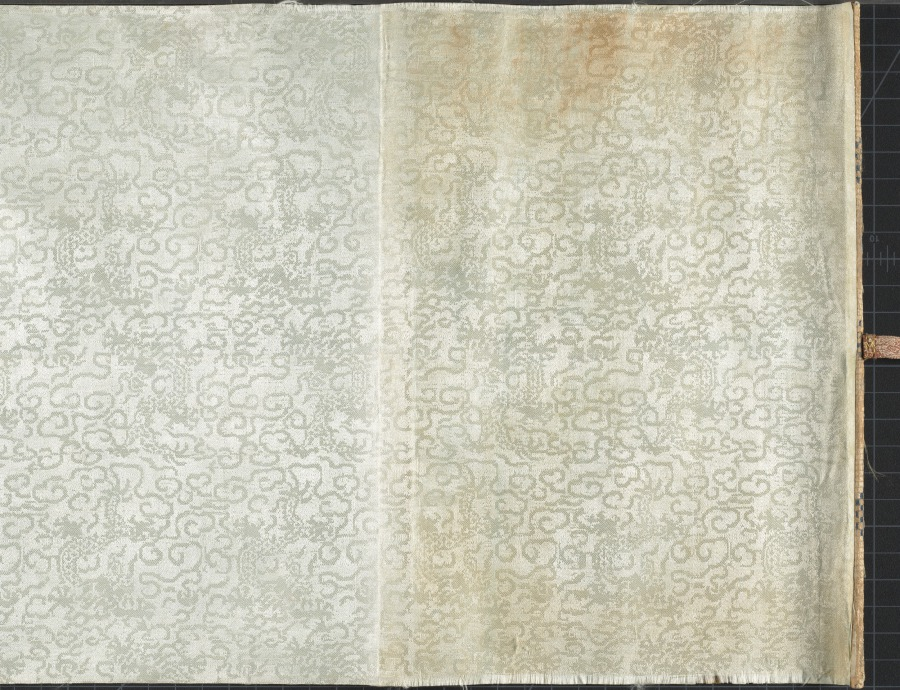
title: Garden for Solitary Enjoyment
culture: China, Ming dynasty (1368–1644)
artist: Qiu Ying (Chinese, 1494–1552)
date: 1515–52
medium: Handscroll; ink and light color on silk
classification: Painting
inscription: Accompanying text of an essay together with seven poems of Sima Guang (1019–1086) and one poem of Su Shi (1037–1101) written by Wen Zhengming (1470–1559) in 1558.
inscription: 2 colophons and 82 seals: 4 seals of Wen Zhengming 文徵明 (1470–1559); 59 seals of Xiang Yuanbian 項元汴 (1525–1590); 1 colophon, dated 1644, and 7 seals of Xiang Yukui 項禹揆 (c. late 1500s–1659); 1 colophon, dated 1880, and 2 seals of Weng Tonghe 翁同龢 (1830–1904); 2 seals of Ch'eng Chen-i (19th c.); 1 seal of Han Ch'ung (19th c.); 4 seals of Wan-go H. C. Weng 翁萬戈 (1918–2020); 3 seals unidentified.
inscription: Colophon by Xiang Yukui 項禹揆 (c. late 1500s–1659): The painting of The Garden for Self-enjoyment on the right by Shih-chou, Mr. Qiu [Qiu Ying] is in the style of Li Lung-mien. Its mood is peaceful, as if meeting the ancient gentlemen face to face among the brushes and silk; it lifts one above the sordid bustle of life. Formerly, my late father handed me this scroll which had only the painting without the written essay. I considered asking a good calligrapher to write the essay to add to it but was afraid that the quality of the writing would not match the painting. Several years later, I saw at a friend's house this essay and poems (of Ssu-ma Kuang] written by Hengshan [Wen Zhengming], once owned by my grandfather; so I spared no expense to obtain it. I rejoiced at this and said: "The divine swords are finally united. How things are pre-destined!" Now my friend Chang Kung-chao's technique for mounting [painting and calligraphy] is excellent. Therefore by daring to take them out and join them together, I can preserve this beautiful story of singular reunion. Xiang Yukui recorded at Hai-yeh-t'ang [hall] two days before New Year's Eve in the jiasheng year of the Chongzhen era [1644]. trans. LYSL/HK/WKH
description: Garden of Solitary Enjoyment refers to a site built in 1073 by the statesman Sima Guang (1019–1086) after he had retired to Luoyang, Henan province. Every spring, visitors would flock to his garden. Each of its seven structures references a historic figure. Sima wrote: I channel streams [like Du Mu], to water flowers [like Bai Juyi], or trim bamboo [like Wang Huizhi]. . . . I know of no joy between heaven and earth that could take its place. Qiu Ying’s painting, created after an 11th-century version of the same theme, must have appealed to garden owners of the Ming dynasty, since it became the template for numerous Suzhou workshop copies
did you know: Sima Guang completed his monumental survey of Chinese history, Zizhi tongjian, in the garden depicted in this painting.